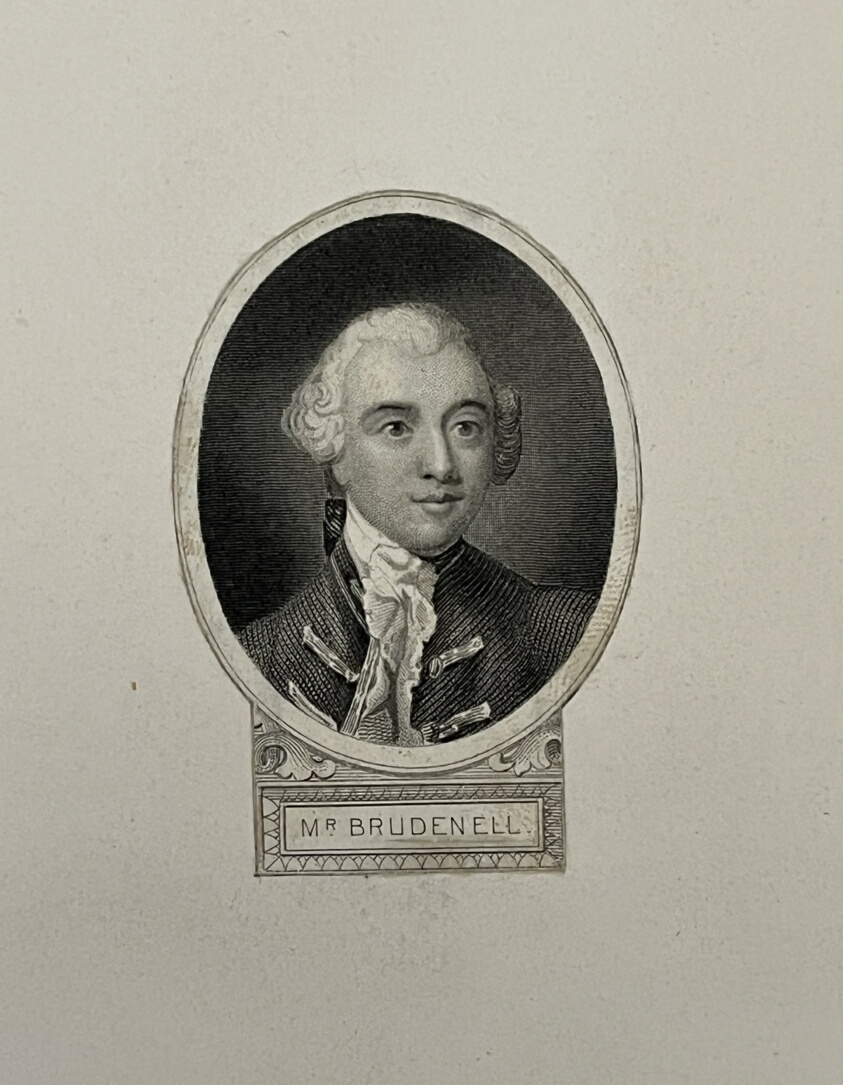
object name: Print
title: Thomas Brudenell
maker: Artist Unknown (Likely American or British, 19th century)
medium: Stipple and line engraving on paper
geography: United States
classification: reproduction; print; prints and drawing